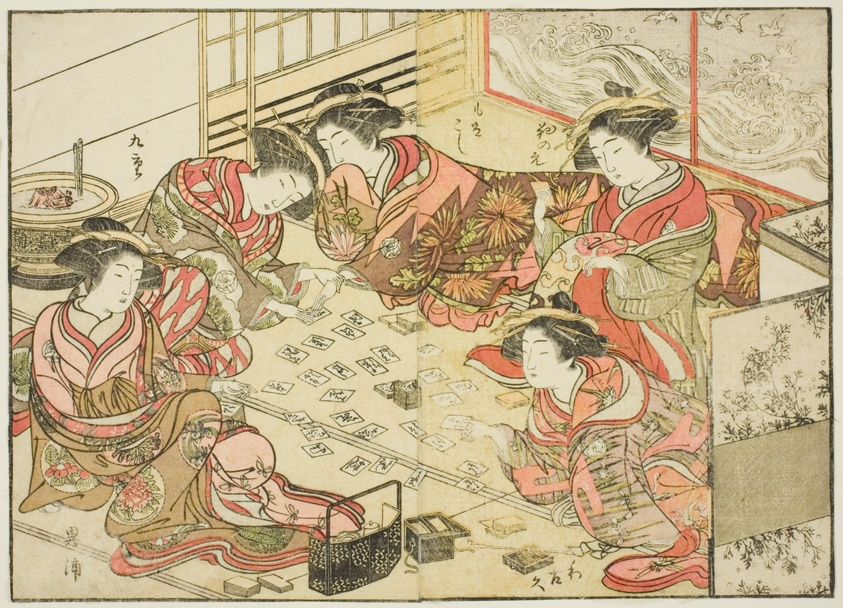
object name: Print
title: Courtesans of the Echizenya, from the book "Mirror of Beautiful Women of the Pleasure Quarters (Seiro bijin awase sugata kagami)," vol. 2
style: Japanese (culture or style)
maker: Katsukawa Shunsho; Japanese, 1726-1792; Kitao Shigemasa; Japanese, 1739-1820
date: 1776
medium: Color woodblock print; double-page illustration cut from a book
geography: Japan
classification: woodblock print; print; asian art